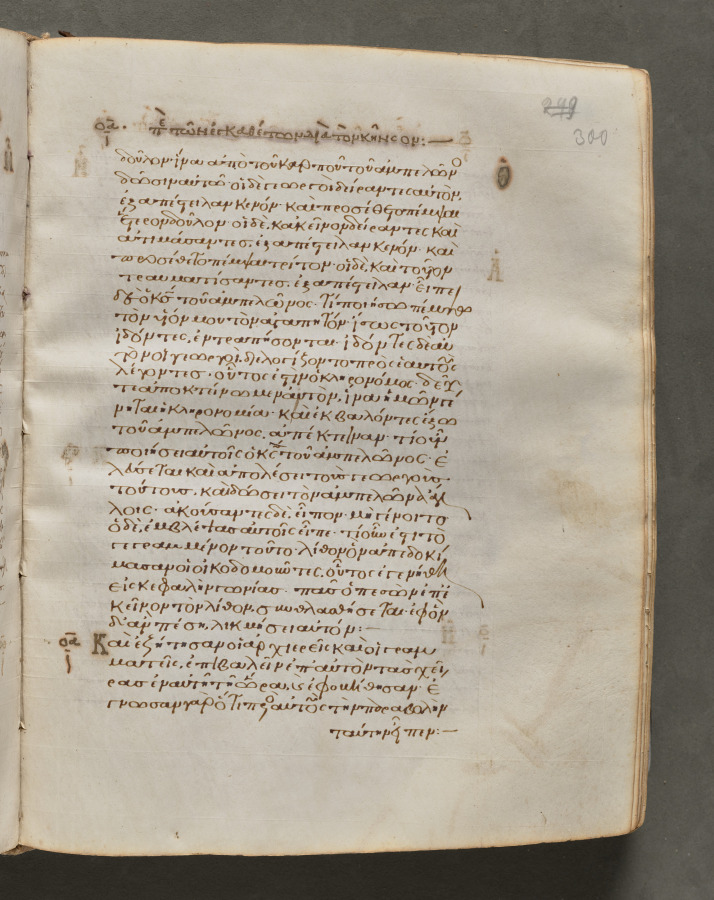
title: Text, folio 300 (recto), from a Gospel Book with Commentaries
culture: Byzantium, Constantinople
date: c. 1000–1100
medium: ink, tempera, and gold on vellum; leather binding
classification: Bound Volume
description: Each of the four gospels in this book opens on a page with brilliantly illuminated borders depicting the author of the text as well as birds—principally peacocks, symbols of the immortality of the soul—and fountains, representing the fountain of life and the salvation of the soul. This volume consists of 428 leaves with texts in Greek. Its level of sophistication suggests that it was probably written and decorated in a monastery in Constantinople.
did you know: Gospel books were carried in procession through Byzantine churches.